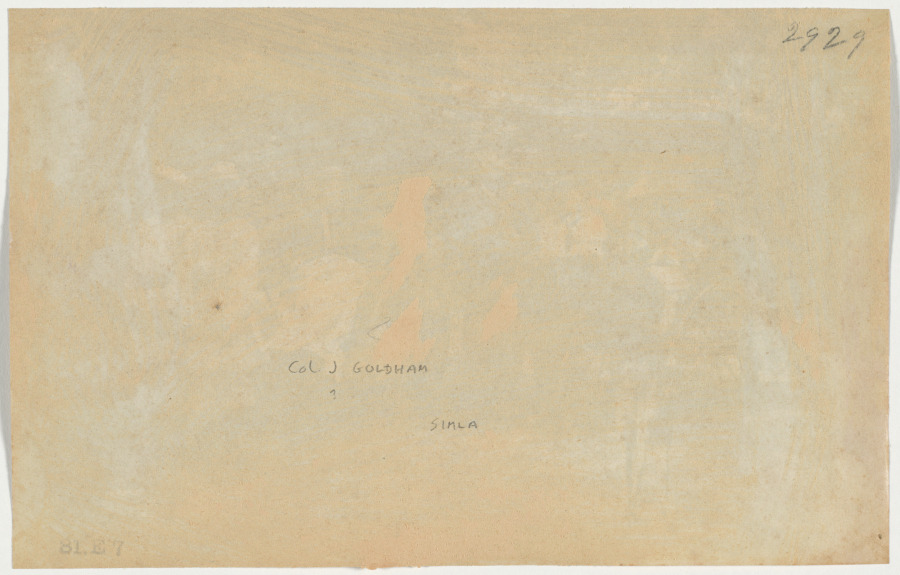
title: Colonel F. G. Oldham, Shimla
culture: India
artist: Raja Deen Dayal (Indian, 1844–1905)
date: 1887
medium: albumen print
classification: Photograph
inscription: Stamped in black ink on verso: “31.E.7” Written in pencil on verso: “Col J Goldham/3/Simla” Written in pencil on verso: “2929”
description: In Deen Dayal’s shots of large groups, the sitters are artfully arranged in close proximity, some even touching. But in his family portraits, at least in this album, the individuals are separated. The top image features Colonel H. R. Thuillier (1838–1922) holding his horse’s bridal, his wife Emmeline, their two terriers, and rickshaw drivers. Thuillier became the surveyor general of India the year this photograph was taken by Deen Dayal, who had just given up surveying for photography. Francis Oldham (1839–1923), an engineer at the India Public Works Department, poses with his wife Nora, their son Brian, an unidentified woman, and rickshaw drivers.